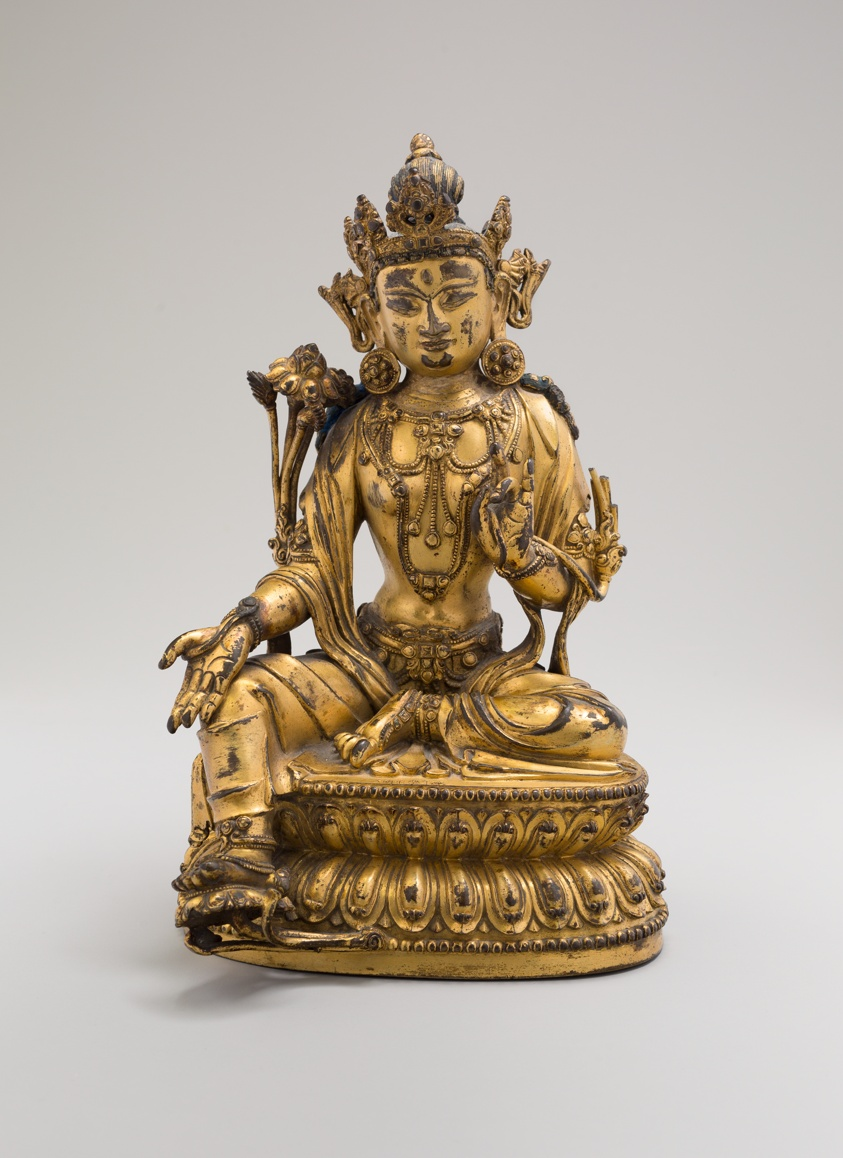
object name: Sculpture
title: Green Tara, Seated in Pose of Royal Ease (Lalitasana), with Lotus Stalks on Right Shoulder and Hands in Gestures of Reasoning (Vitarkamudra) and Gift Conferring (Varadamudra)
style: Chinese (culture or style)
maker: China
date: Ming dynasty (1368–1644), Yongle reign mark and period (1403–24)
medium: Gilt copper alloy with traces of pigment (lapis lazuli)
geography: China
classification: bronze; metal; sculpture; asian art